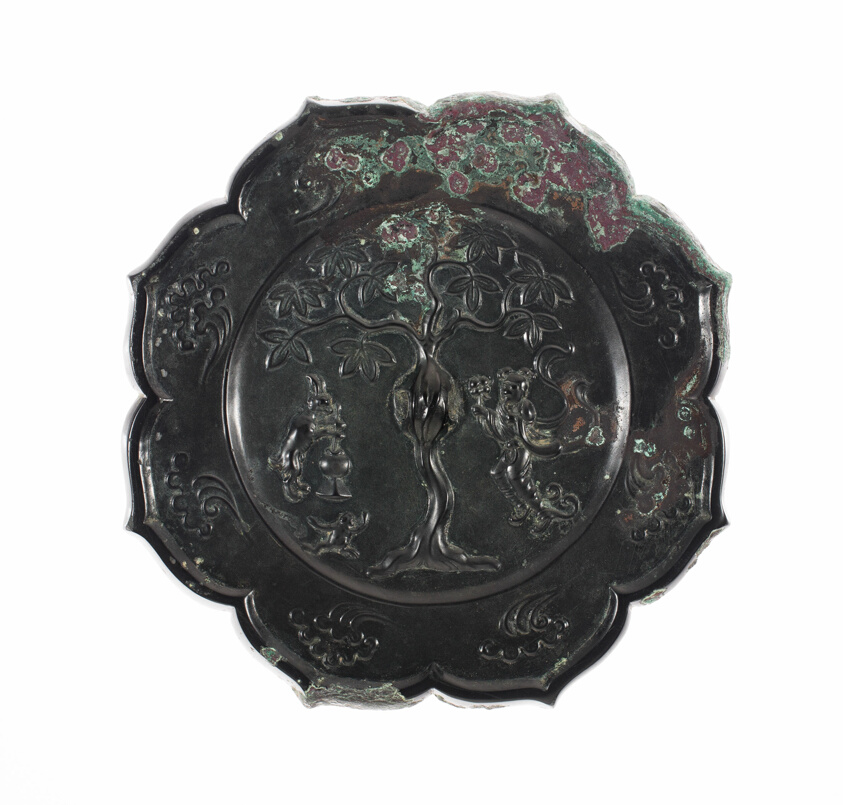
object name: Decorative Arts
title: Lobed Mirror with Images of the “Moon Palace”: Hare Pounding Elixir, Toad, and Chang E Holding Peaches of Immortality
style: Chinese (culture or style)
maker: China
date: Tang dynasty (A.D. 618–907), 8th century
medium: Bronze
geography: China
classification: bronze; metal; mirror; asian art; decorative arts